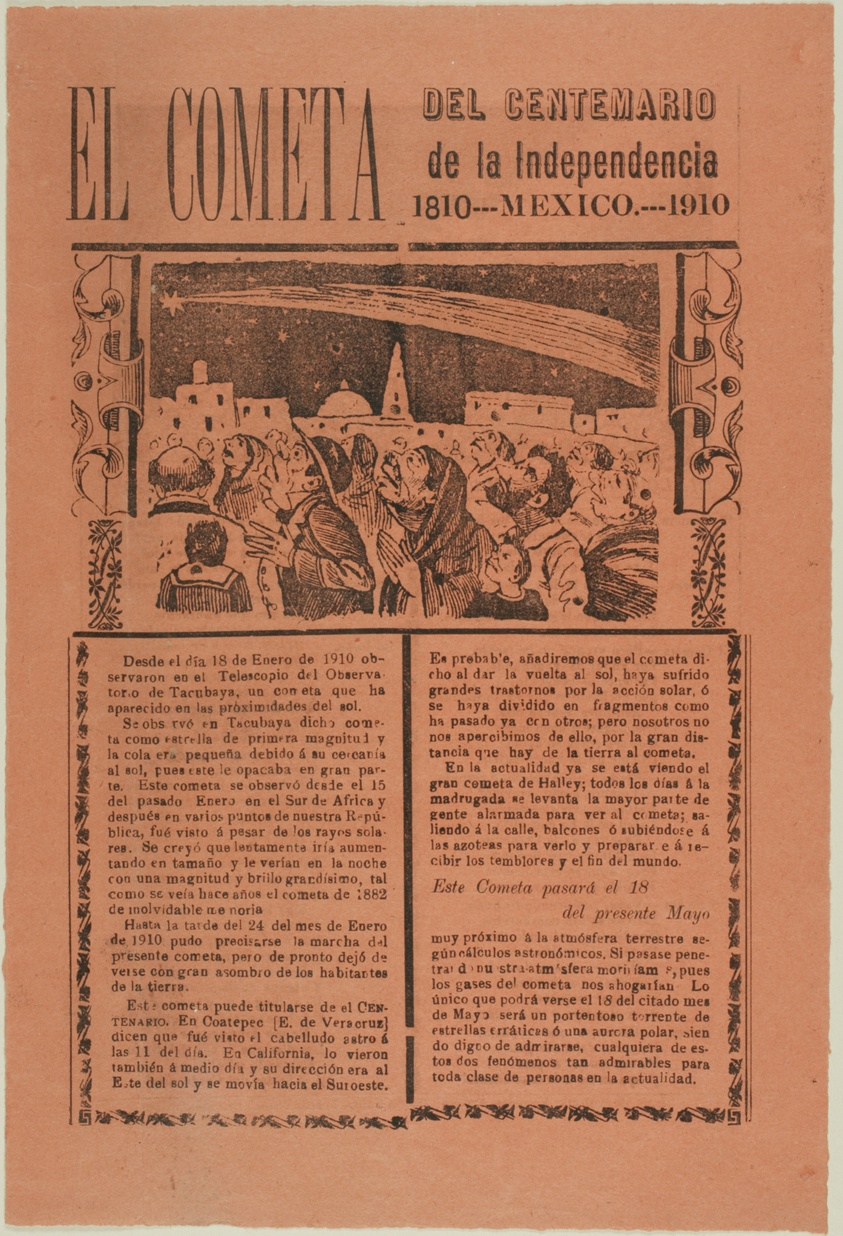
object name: Print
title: The Comet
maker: José Guadalupe Posada (Mexican, 1852-1913)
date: 1899, published 1910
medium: Double-sided relief engraving on zinc on paper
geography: Mexico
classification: woodcut; print; prints and drawing